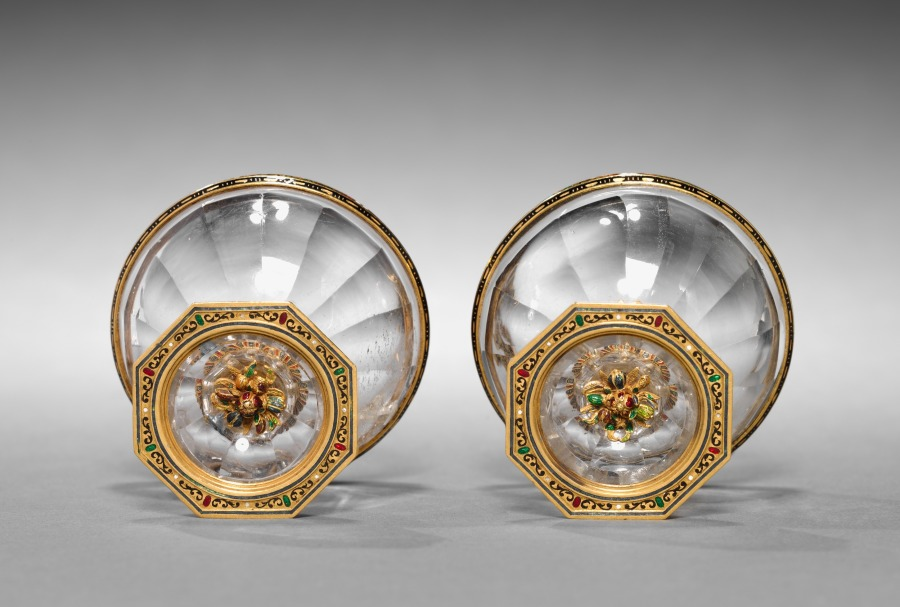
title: Double Cup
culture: Italy, late 16th century (possibly 19th century forgery, or 16th and 19th century pastiche)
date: late 16th century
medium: rock crystal set in enameled gold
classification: Enamel